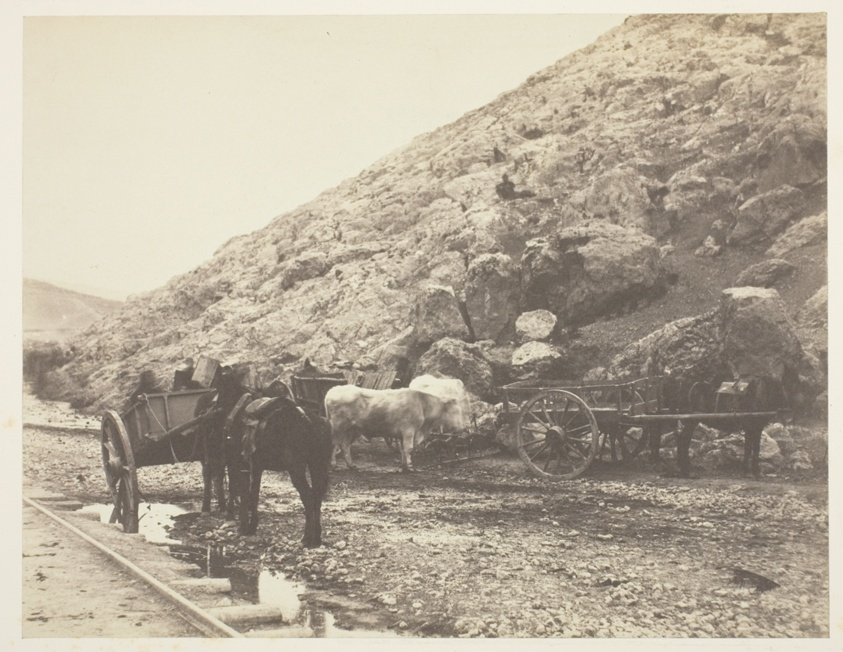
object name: Photograph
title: Cattle and Carts, leaving Balaklava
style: 19th century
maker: Roger Fenton (English, 1819–1869)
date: 1855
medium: Salted paper print, from the album "Photographic Pictures of the Seat of War in the Crimea" (1856)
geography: England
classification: salted paper print; photographic process; photography; photograph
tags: Collected by Hugh Edwards